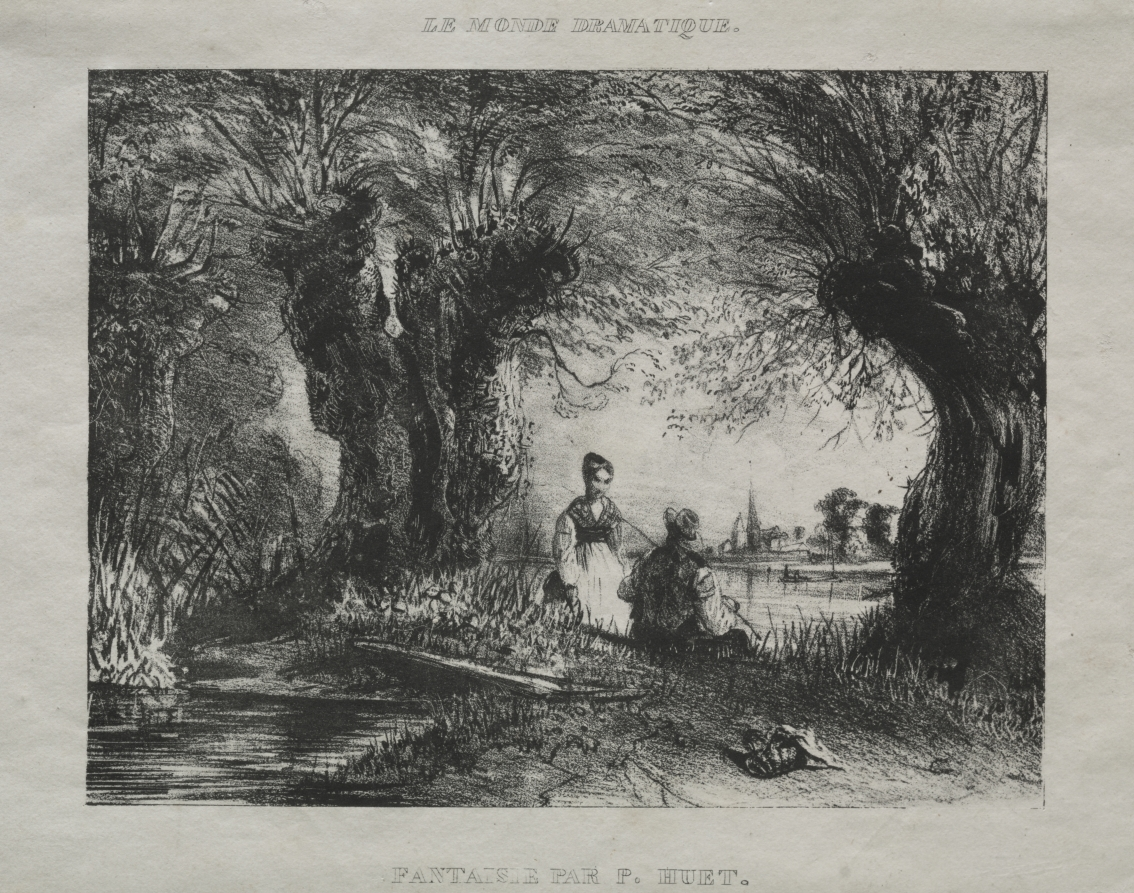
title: Fantasy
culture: France, 19th century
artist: Paul Hüet (French, 1803–1869)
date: 1836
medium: lithograph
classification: Print